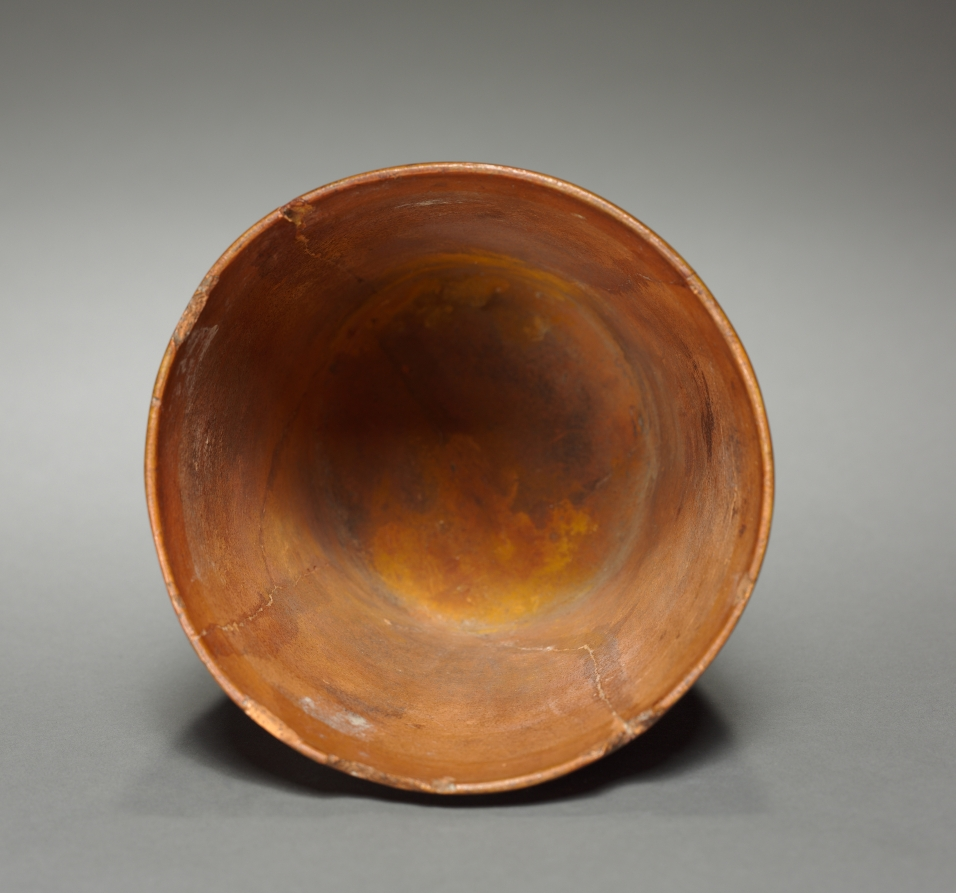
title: Kero-shaped Vessel (modern version of a Wari-style vessel)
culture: Peru, modern, 20th century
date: before 1955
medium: pottery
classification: Forgery